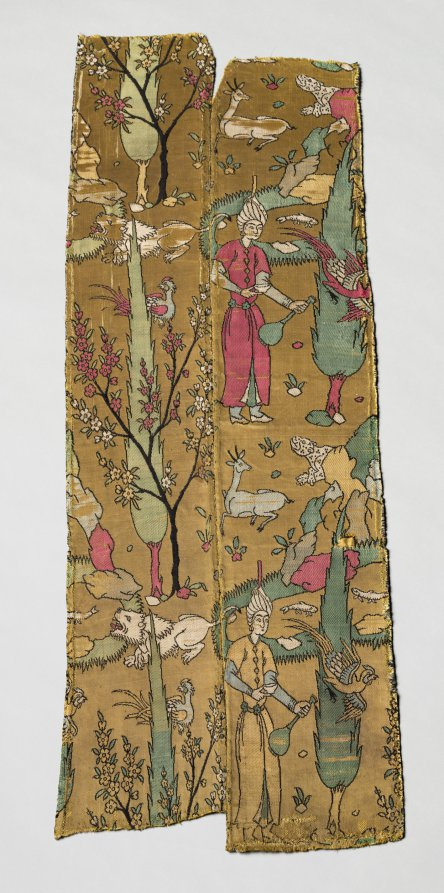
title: Wine bearers in landscape, from a robe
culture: Iran, Safavid period (1501–1722)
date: 1525–50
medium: Silk: lampas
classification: Textile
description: Iran is renowned for representations of large human figures in luxury silks during the Safavid period. Symbolic images of beauty and love characterize this signature silk in which a wine bearer appears in a landscape with cypresses and blossoming prunus trees, a pond, and a rocky hill along with animals of royal hunts. Cypresses and long-neck bottles were metaphors for elegance and male beauty while cypresses entwined by blossoming trees, paired pheasants, youth, and wine impart themes of love. The asymmetrical composition contrasts vitality and order, which contributes to concealing the repeated design inherent in patterned silks.